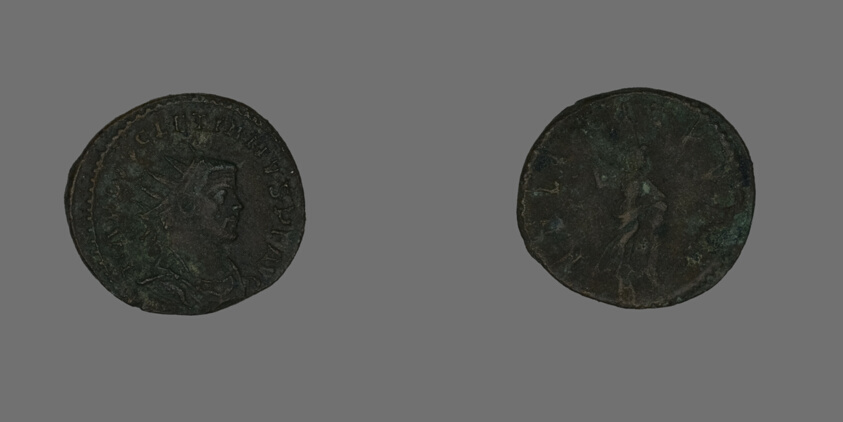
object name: Coin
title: Coin Portraying Emperor Diocletian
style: roman (ancient, style or period), ancient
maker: Roman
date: 290-295 (?)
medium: Silver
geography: Roman Empire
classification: coin; ancient art